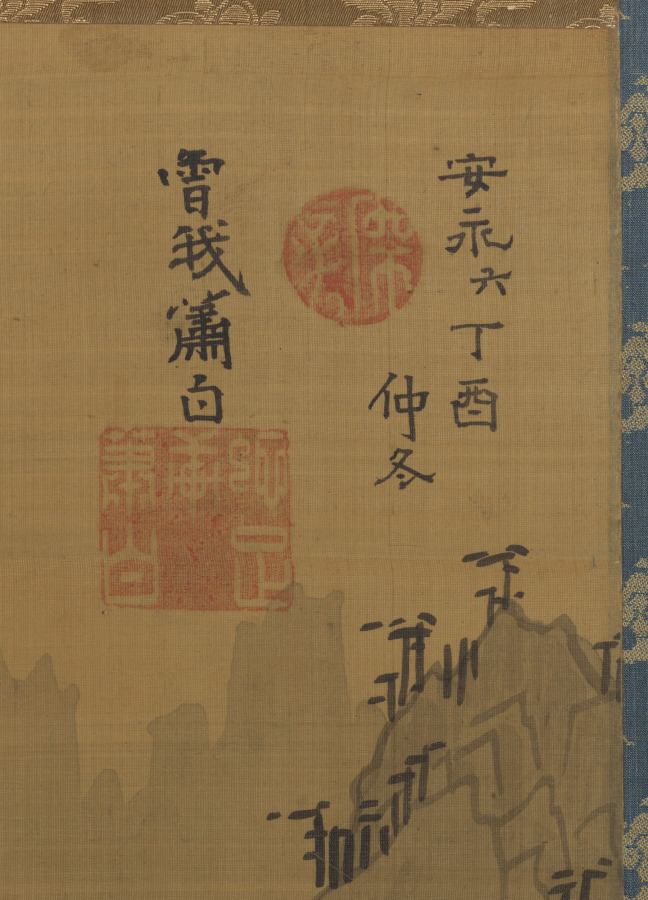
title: Orchid Pavilion Gathering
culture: Japan, Edo period (1615–1868)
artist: Soga Shōhaku (Japanese, 1730–1781)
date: 1777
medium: hanging scroll; ink on silk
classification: Painting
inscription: Inscribed upper right: Sixth year of An'ei (1777) mid-winter, Soga Shohaku Seal: Dasokken Shohaku Seal: Unread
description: This painting depicts a famous gathering that took place in China in AD 353 to celebrate the Spring Purification Festival, also known as the Double Third Festival, as it takes place on the third day of the third lunar month. The host invited everyone to the Orchid Pavilion to compose poetry and drink wine. Guests floated wine cups down a nearby creek, and where they landed, people had to drink the wine and compose a poem.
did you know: The Buddhist temple Bairinji in Kurume City, Fukuoka prefecture, Japan, and the National Gallery of Victoria in Melbourne, Australia, own compositions by the same artist on the same theme.